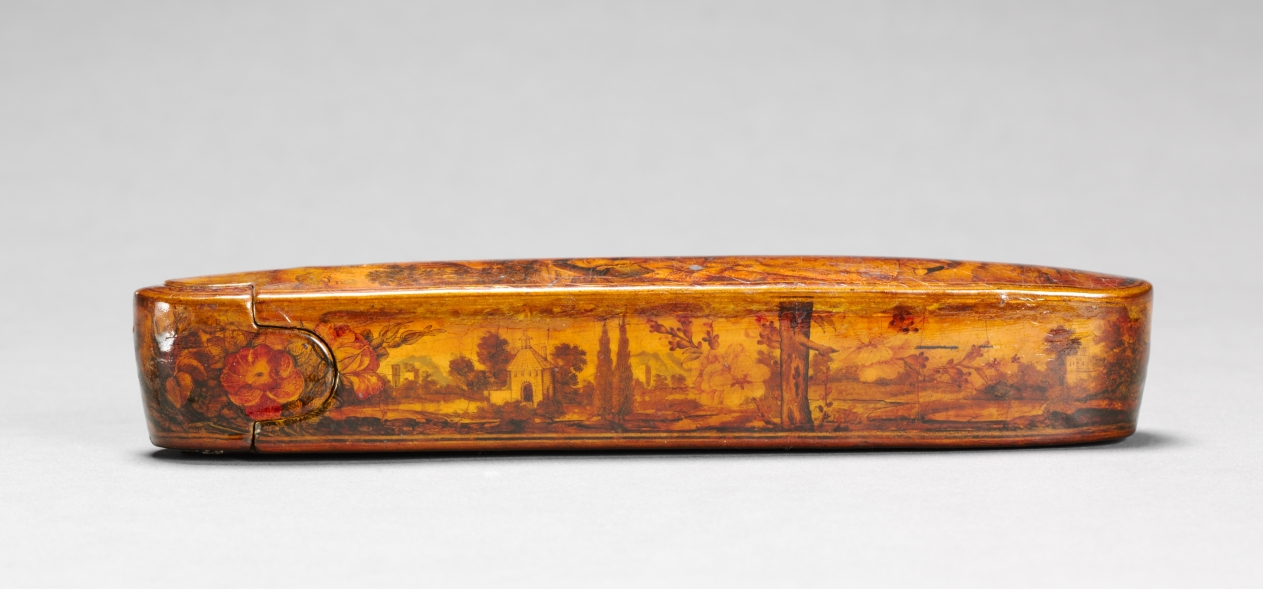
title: Pen and Ink Box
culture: Iran, probably Isfahan, Safavid period (1501–1722)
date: 1667–98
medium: Varnished lacquer and opaque watercolor over papier-mâché, ink, and copper alloy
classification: Lacquer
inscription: 1109